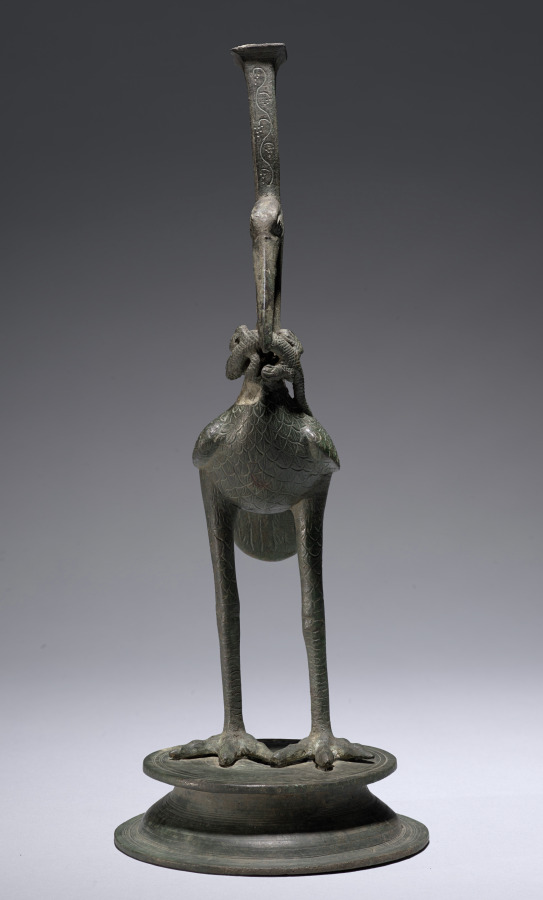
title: Ibis Eating a Lizard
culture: Italy, Rome, Roman Empire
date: 100 BCE–100 CE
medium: bronze, hollow cast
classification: Sculpture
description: The ibis is an Egyptian bird, shown here standing firmly on both legs with a lizard in its beak. The bird rests on a two-tiered circular base, and a vertical stem with incised decoration extends above the ibis’s head. While an Egyptian animal, the image of the ibis devouring a lizard became common only in the Roman world, depicted in wall paintings and seen on Barbotine ware, a type of pottery. This sculpture may be unique, however, in showing this motif in the round.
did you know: This sculpture was possibly used as a support for furniture, a candelabrum, or an incense burner.